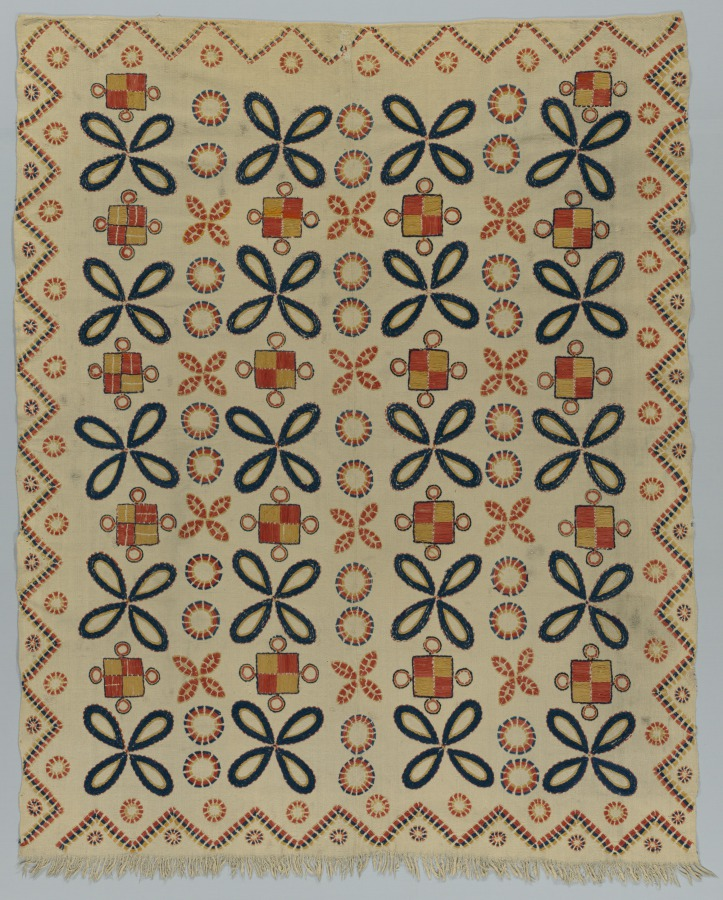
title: Blanket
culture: America, early 19th century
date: early 19th century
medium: hand weave and embroidery: wool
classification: Textile